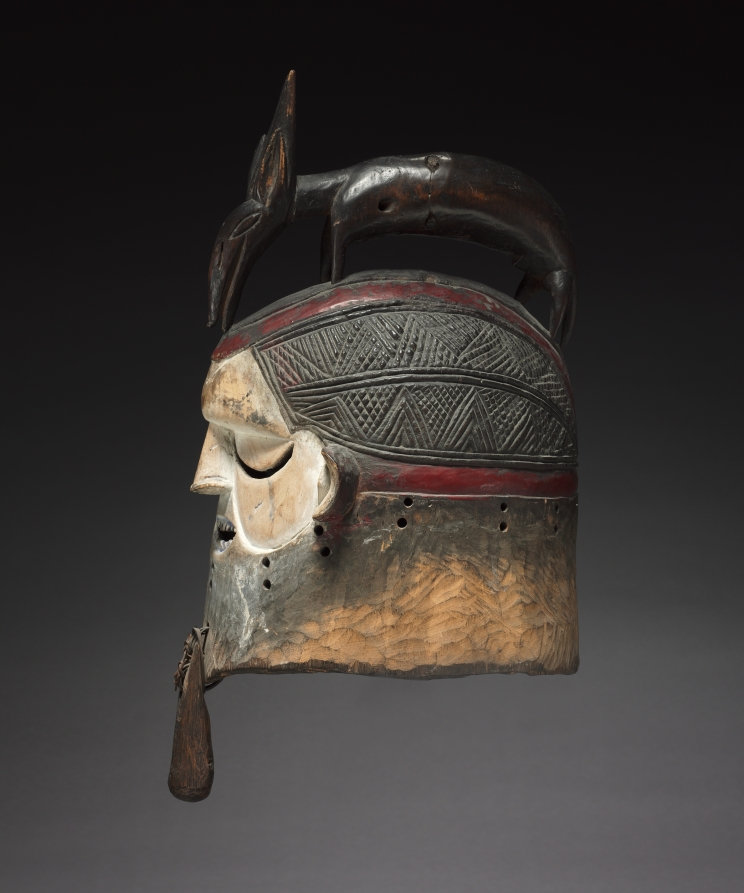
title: Mask (hemba)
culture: Africa, Central Africa, Democratic Republic of Congo, Suku-style carver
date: late 1800s–early 1900s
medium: Wood, reed, paint, and metal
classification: Mask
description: Suku helmet masks are often used in initiation ceremonies for young men in the society. Helmet masks such as this represent images of deceased elders in the society. They are to ensure successful hunting, help cure illnesses, and protect its wearer from evil. The animal shaped like a gazelle or antelope is typically associated with folktales, proverbs, and personal hunting exploits.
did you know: Suku helmet masks are often used in initiation ceremonies for young men in the society.